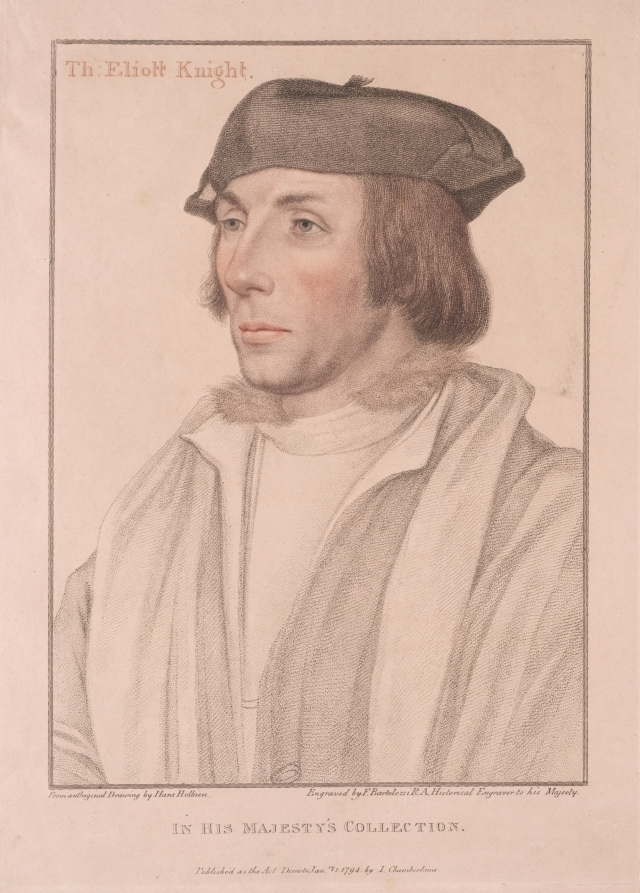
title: Sir Thomas Eliott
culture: England, 18th century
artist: Francesco Bartolozzi (British, 1727–1815)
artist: after Hans Holbein (German, c. 1465–1524)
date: 1794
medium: color stipple engraving and etching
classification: Print